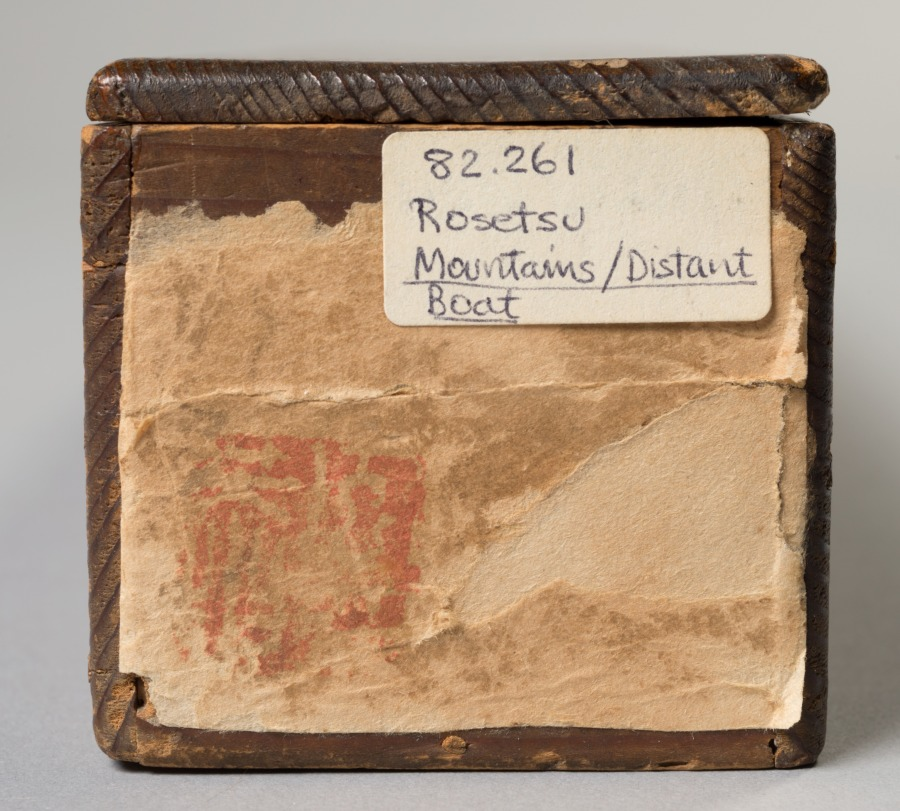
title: Mountains and Distant Boats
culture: Japan, Edo period (1615–1868)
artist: Nagasawa Rosetsu (Japanese, 1754–1799)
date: late 1700s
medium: hanging scroll; ink and slight color on paper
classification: Painting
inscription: Signed: 蘆雪; Sealed: 引裾